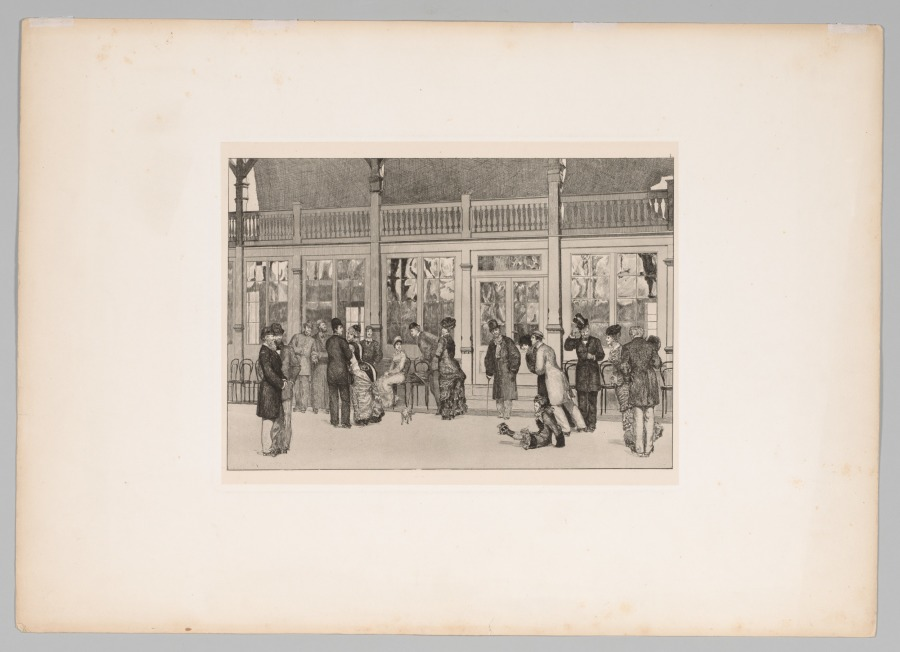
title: A Glove: The Locale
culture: Germany, 19th century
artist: Max Klinger (German, 1857–1920)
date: 1880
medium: etching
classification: Print